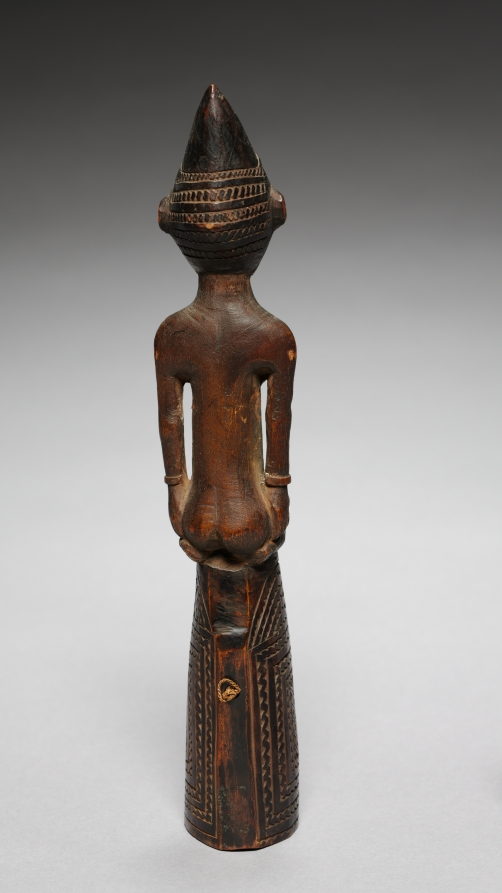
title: Bell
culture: Africa, Central Africa, Democratic Republic of the Congo, or Republic of the Congo, Kongo-style or Vili-style maker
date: early 1900s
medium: Wood and plant fiber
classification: Sculpture